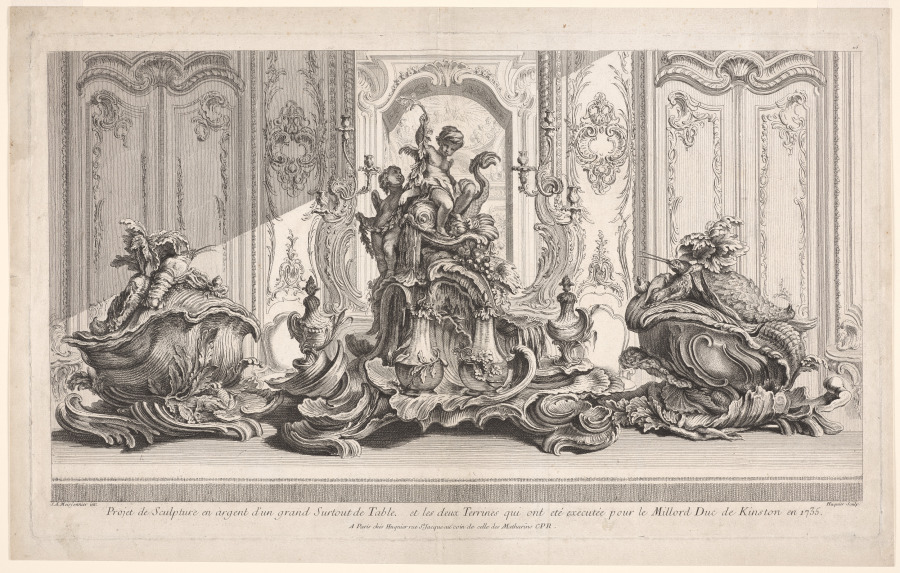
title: Silver Sculptural Project for a Large Centerpiece and Two Tureens Which Have Been Executed for His Lordship the Duke of Kingston, plate 115 from Works of Juste-Aurèle Meissonier (Oeuvre de Juste-Aurèle Meissonier)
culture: France, 18th century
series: Works of Juste-Aurele Meissonier (Oeuvre de Juste- AurPle Meissonier), plate 115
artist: Gabriel Huquier (French, 1695–1772)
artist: after Juste-Aurèle Meissonnier (French, 1695–1750)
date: c. 1735–37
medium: etching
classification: Print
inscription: J. A. Meissonier inv./Huquier Sculp.; Inscriptions: Below title: A Paris chJs Huquier rue St Jacque au coin de celle des Matburins CPR.; upper right: 115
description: In addition to documenting an important commission, this etching endorses the designer’s stylish products by associating them with social status. Meissonnier’s name appears below the image on the left, and the large inscription identifies the illustrious patron, the Duke of Kingston, known well in Parisian society. Perhaps functioning similarly to a magazine advertisement today, the fashionable rococo-style scene invites viewers to imagine themselves as the owners of the luxurious tableware. Contrary to the inscription at the bottom of the sheet, the etching actually shows two views of only one of the tureens made for the Duke of Kingston (the tureen displayed nearby). The tureen not depicted features a crab instead of a lobster on the lid. The grand sculptural centerpiece was probably never produced.